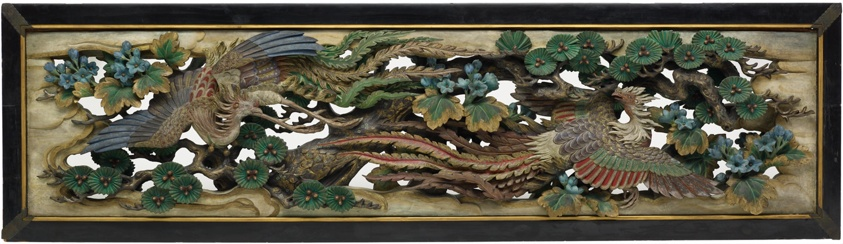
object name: Architectural fragment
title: Transom panels (ramma) from the Phoenix Pavilion (Hōōden)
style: Japanese (culture or style)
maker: Takamura Kо̄un (Japanese, 1852-1934)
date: 1893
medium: Wood with polychrome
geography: Japan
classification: wood; architectural fragment